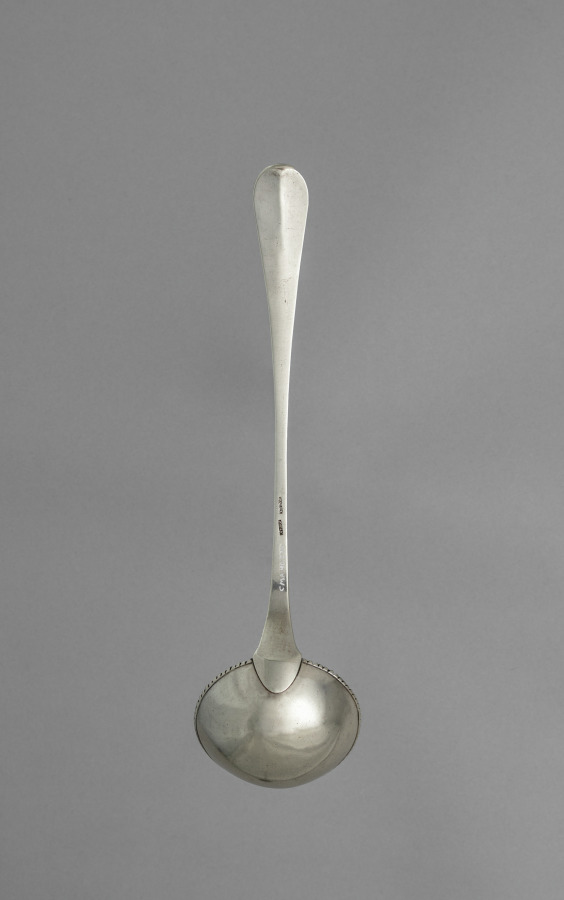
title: Soup Ladle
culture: America, New York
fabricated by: John Burt Lyng (American, 1785)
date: c. 1780–1785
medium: silver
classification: Silver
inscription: engraved "SMR" in script on top of handle end.